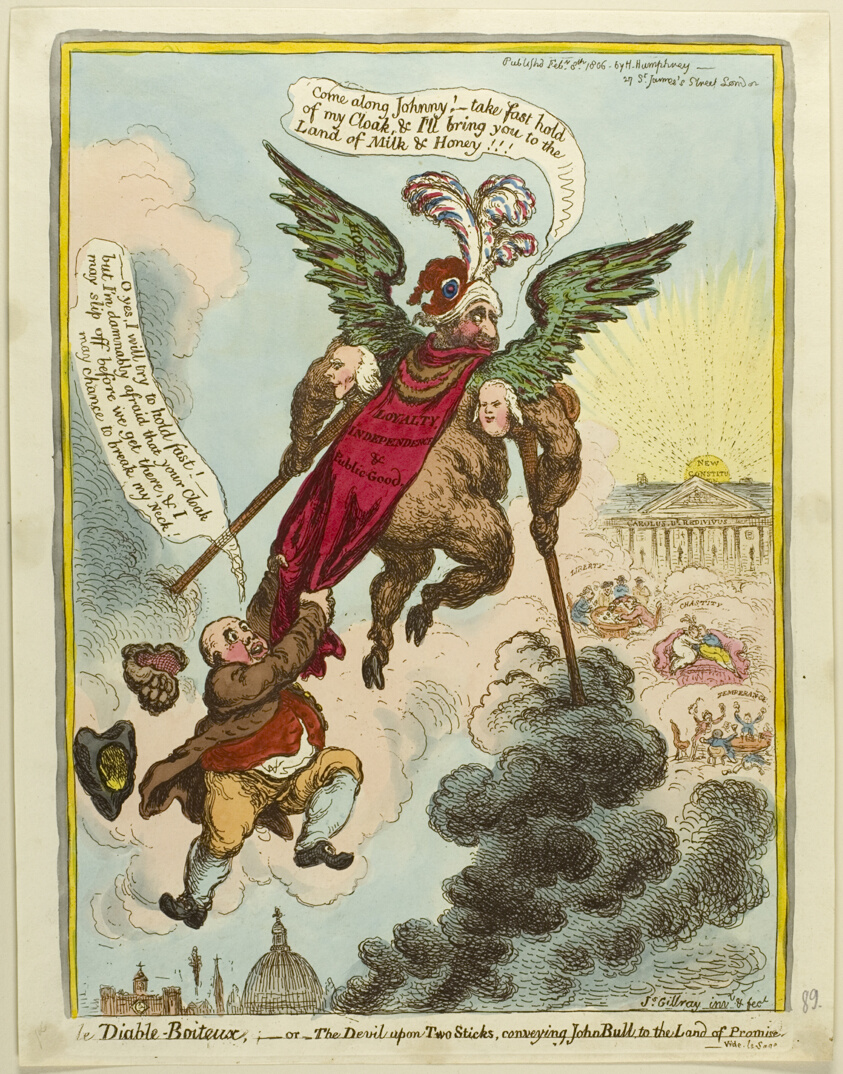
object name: Print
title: Le Diable-Boiteux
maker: James Gillray (English, 1756-1815); published by Hannah Humphrey (English, c. 1745-1818)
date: published Feburary 8, 1806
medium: Hand-colored etching on paper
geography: England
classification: etching; print; prints and drawing